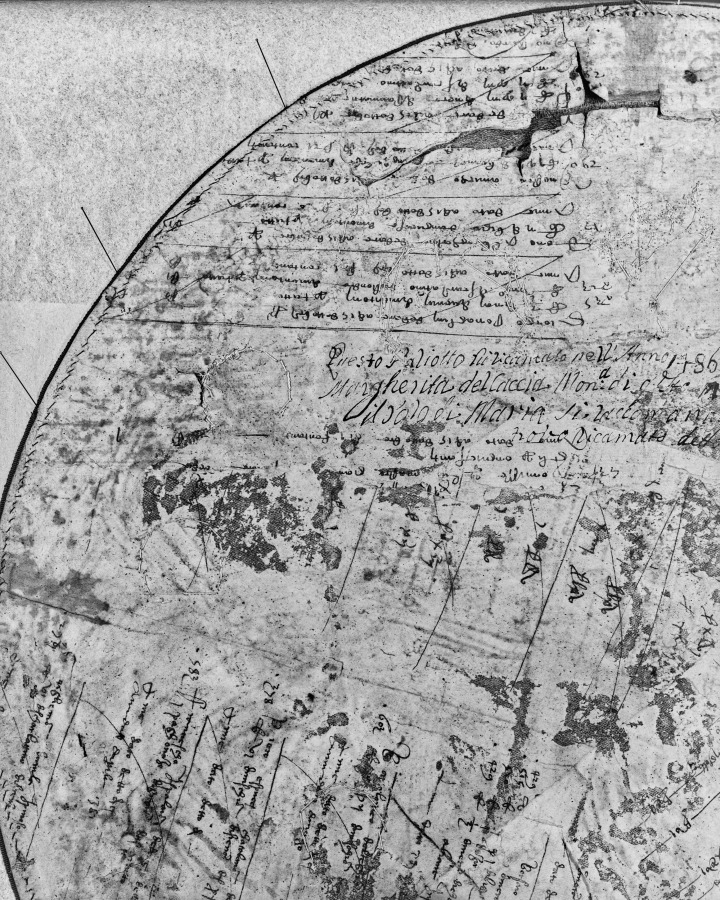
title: Embroidered Tondo from an Altar Frontal: The Coronation of the Virgin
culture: Italy, Florence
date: 1459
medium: Embroidery with gold, silver, and silk thread; split, satin, and couching stitches, or nué (shaded gold)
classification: Embroidery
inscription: the embroidery is backed by an old reused parchment with Latin writing over which in Italian is penned an inscription: "This pallioto was embroidered in the year 1486 by the venerable Margherita del Caccia nun of this monastery. . ." [It is difficult to know to what extent one should rely on this inscription as the style and technique both point clearly to an earlier date.]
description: This masterpiece of Florentine embroidery takes the circular form called a tondo and was likely once attached to an altar frontal. The scene depicts the coronation of the Virgin, the final and culminating event in the narrative cycle of her life. Honoring her as queen of heaven, Christ places the crown on his mother’s head. They are surrounded by eight angels as well as Saints Verdiana and John Gualberto, both much esteemed in Florence, creating a joyous scene. During the Renaissance, Florence emerged as an important center for a specific type of embroidery known as or nué, or shaded gold. This stunning technique used metal and silk threads, as seen here, to create pictures that rivaled paintings. It was frequently used for vestments and altar frontals.